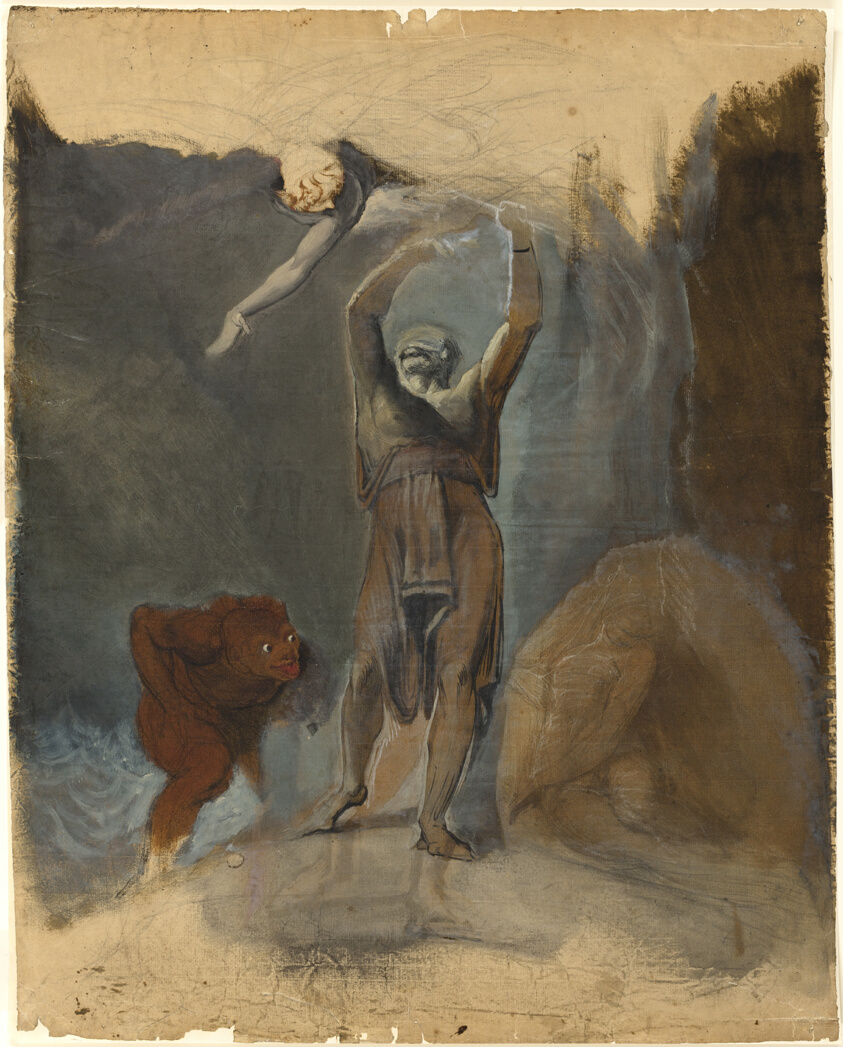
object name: Drawing and Watercolor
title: Prospero, Miranda, Caliban and Ariel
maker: Attributed to Henry Fuseli; Swiss, active in England, 1741-1825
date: 1800/05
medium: Oil and oil wash, with pen and black ink, charcoal, and touches of incising, heightened with touches of white chalk, on tan laid paper, laid down on off-white Japanese paper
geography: England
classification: gouache; drawings (visual works); prints and drawing; paper